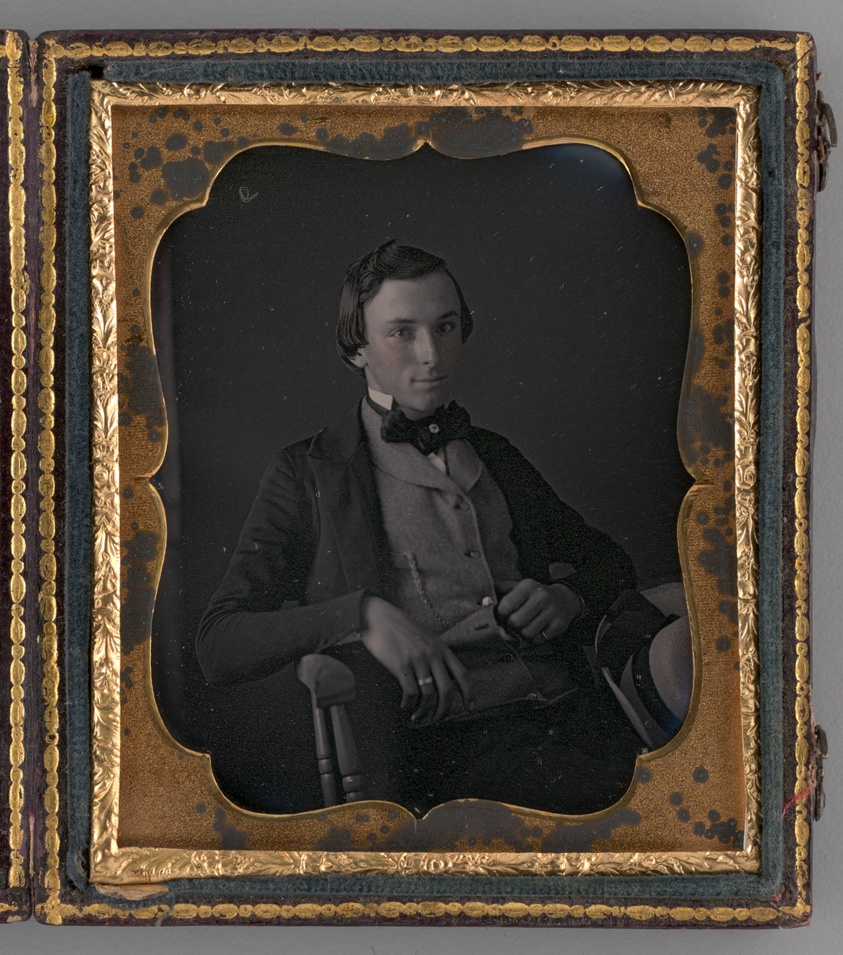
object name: Photograph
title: Untitled (Portrait of a Man)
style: 19th century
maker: Unknown maker; American, 19th century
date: 1855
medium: Daguerreotype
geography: United States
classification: portrait; photograph; photographic process; photography; portrait; daguerreotype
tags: lundberg collection, portraits, portraits: male subject